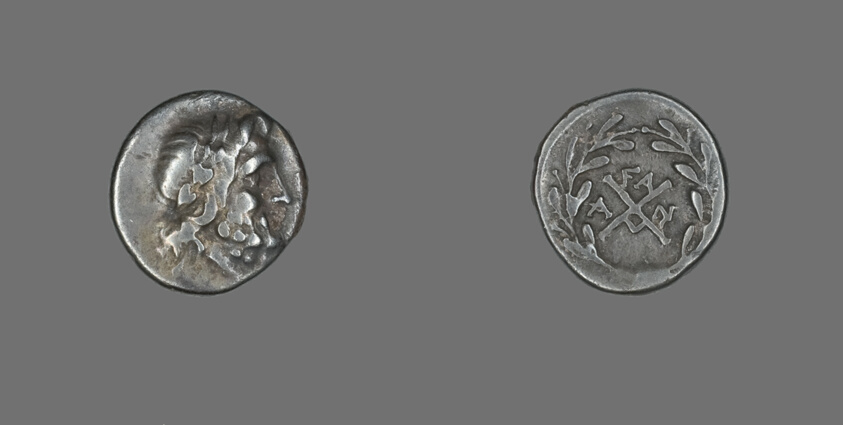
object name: Coin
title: Hemidrachm (Coin) Depicting the God Zeus Amarios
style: greek, ancient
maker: Greek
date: 191-146 BCE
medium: Silver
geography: Ancient Greece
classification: coin; ancient art